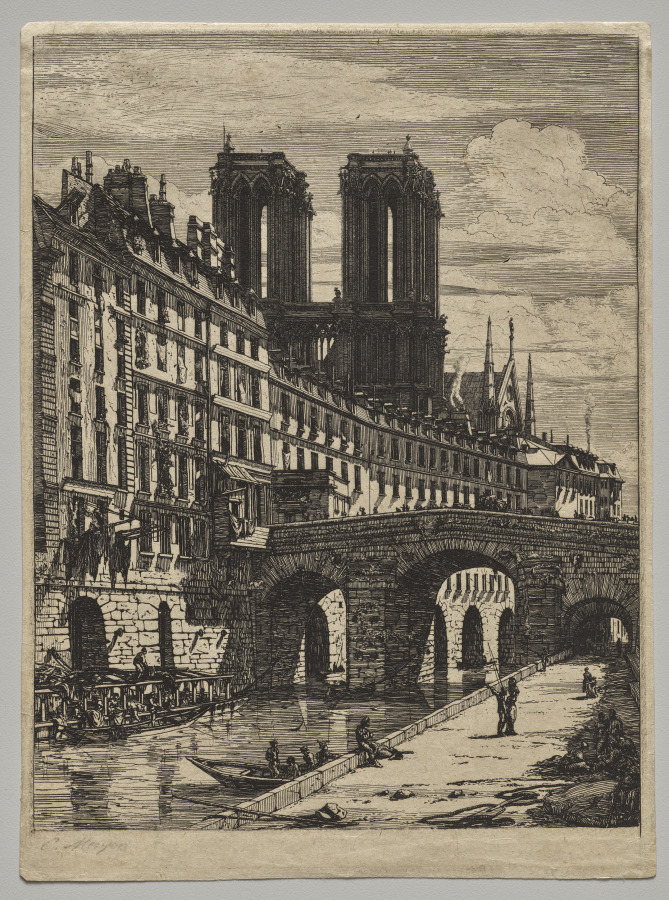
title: Petit Pont, Paris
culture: France, 19th century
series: Etchings of Paris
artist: Charles Meryon (French, 1821–1868)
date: 1850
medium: etching with engraving on Japanese paper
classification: Print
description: Charles Meryon used etching—a technique that involves drawing on a printing plate with a needle’s point—to create minutely detailed images of Paris that imaginatively present recognizable sites. This print features bateaux-lavoirs (wash boats) on the Seine River, where laundresses could purchase a spot to do their washing. The boats appealed to Meryon, who was fascinated by Paris’s gradual transformation. Since they attracted crowds of working-class women, administrators considered the boats unsightly and unhygienic, repeatedly pushing them closer to the city’s outskirts until few remained by the end of the 1800s.